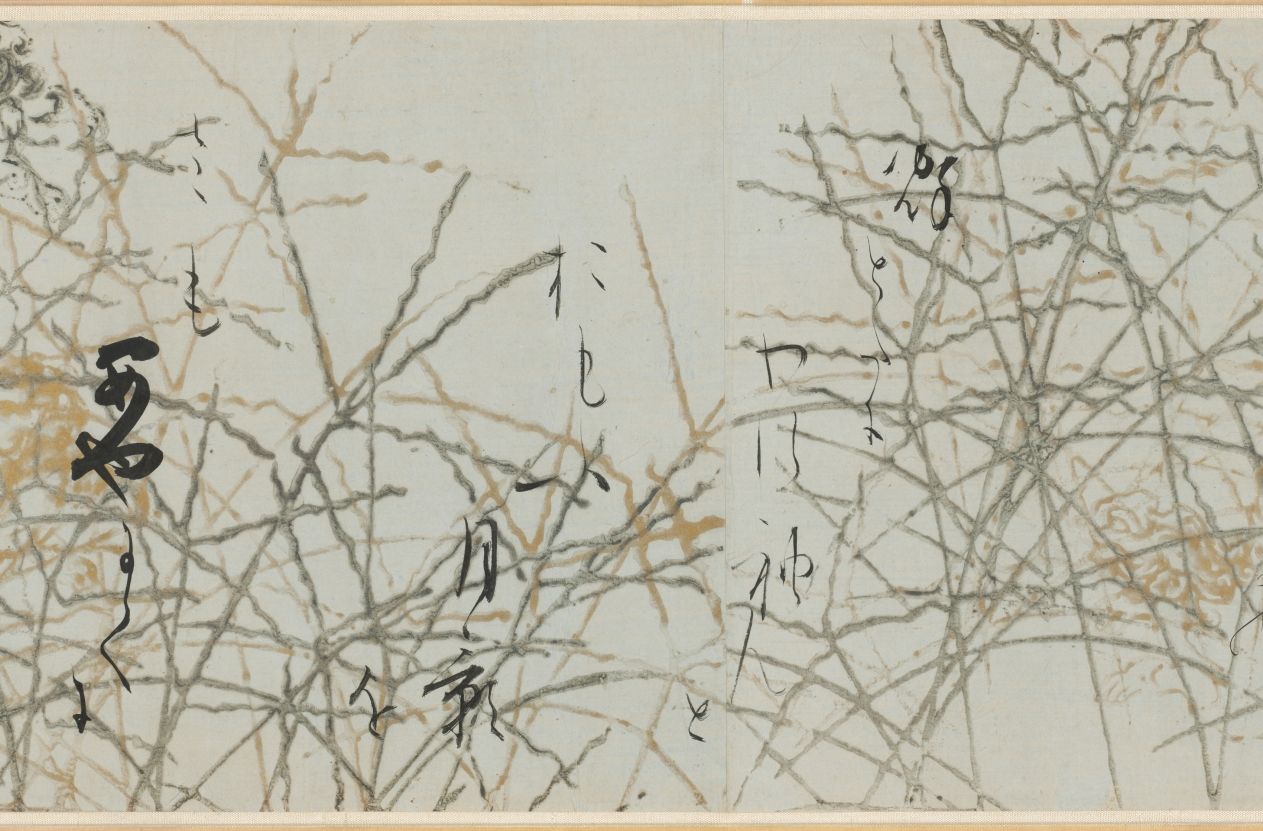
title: Selections from the New Collection of Japanese Poems from Ancient and Modern Times (Shinkokin wakashū) with Printed Designs of Chinese Lions and Crab Finger Grass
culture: Japan, Edo period (1615–1868)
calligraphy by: Hon'ami Kōetsu (Japanese, 1558–1637)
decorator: Tawaraya Sōtatsu (Japanese, c. 1570–c. 1640)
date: early 1600s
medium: handscroll; ink, gold, and silver on paper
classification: Calligraphy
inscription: Seal: 光悦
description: Hon’ami Kōetsu was a calligrapher and craftsman who frequently collaborated with the painter Tawaraya Sōtatsu, considered the first master of the Rinpa school. Kōetsu brushed seven poems from the autumn section of a poetry anthology onto dyed paper with motifs designed and printed in gold and silver by Sōtatsu.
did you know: Before becoming a master painter of screens, Tawaraya Sōtatsu painted fans.